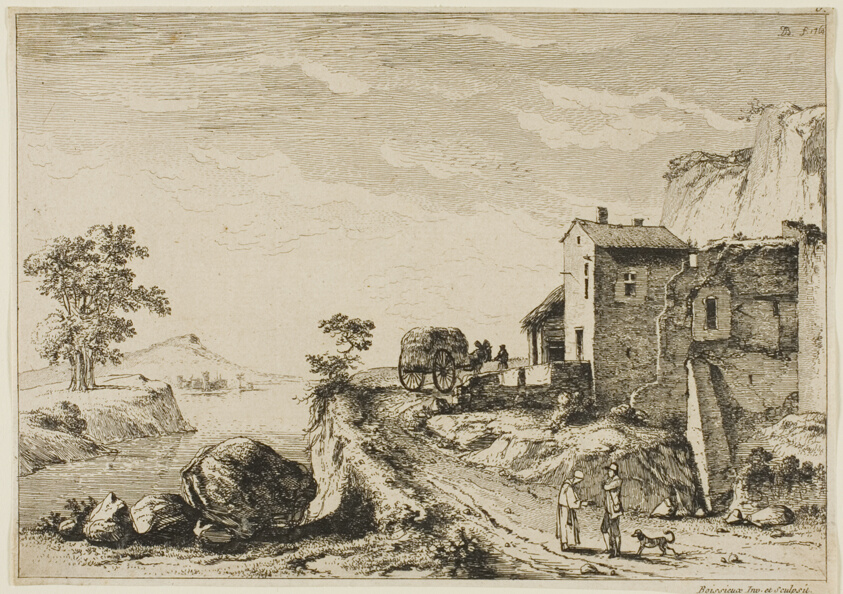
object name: Print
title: The Monk and the Hunter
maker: Jean Jacques de Boissieu (French, 1736-1810)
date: 1796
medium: Etching on paper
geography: France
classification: etching; print; prints and drawing